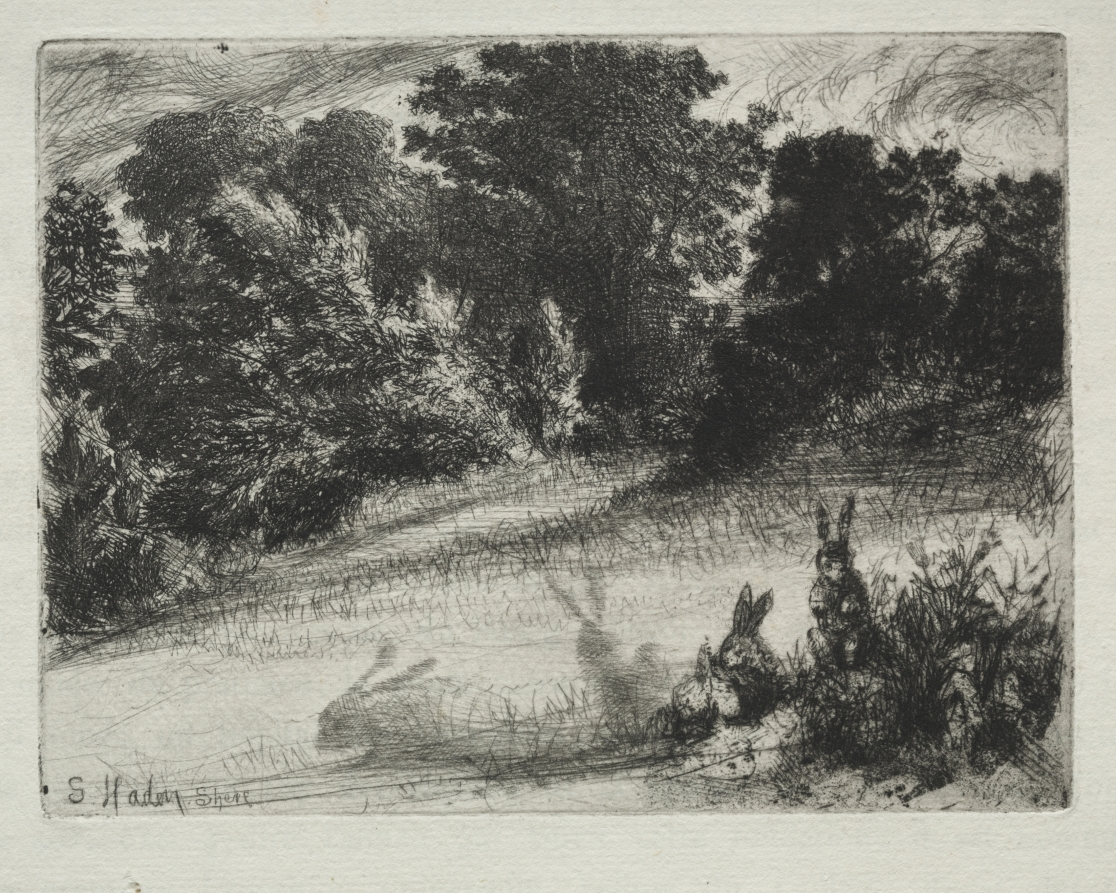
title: Combe Bottom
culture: England, 19th century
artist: Francis Seymour Haden (British, 1818–1910)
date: 1860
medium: etching and drypoint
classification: Print